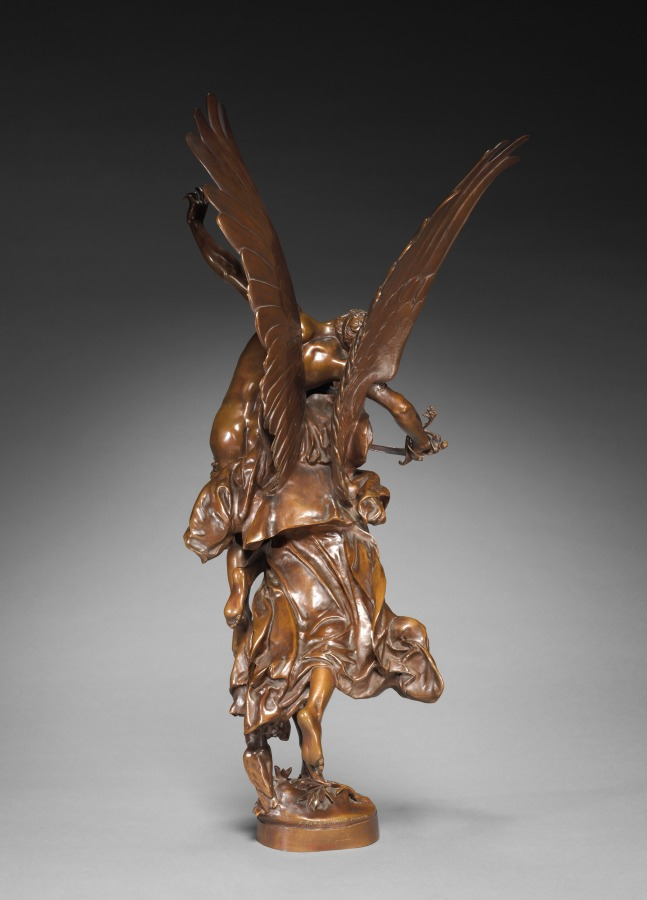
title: Gloria Victis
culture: France, 19th century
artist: Antonin Mercié (French, 1845–1916)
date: c. 1880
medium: bronze with gilding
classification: Sculpture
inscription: Signed near foot at right: "A. MERCIE."; inscribed rear: "F. BARBEDIENNE. FONDEUR."; inscribed front of base: "GLORIA VICTIS."